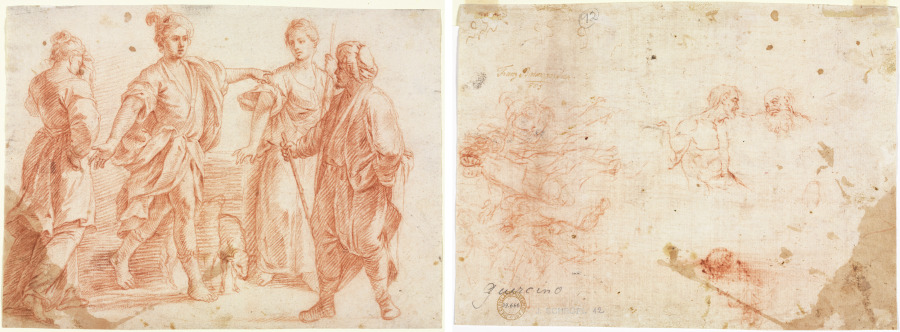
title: Jacob and Laban with Rachel and Leah (recto); Sketch of Two Men and Other Various Figures (verso)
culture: Italy, Bologna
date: 1600s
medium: red chalk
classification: Drawing